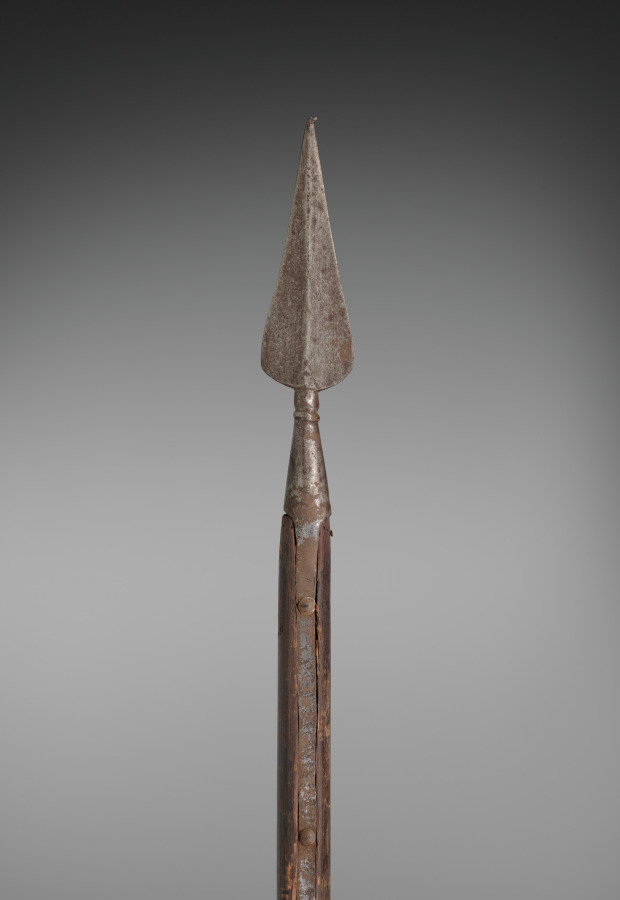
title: Banner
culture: Switzerland, Savoyard, 17th century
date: 1600s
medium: silk ground, small steel lance head on shaft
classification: Arms and Armor